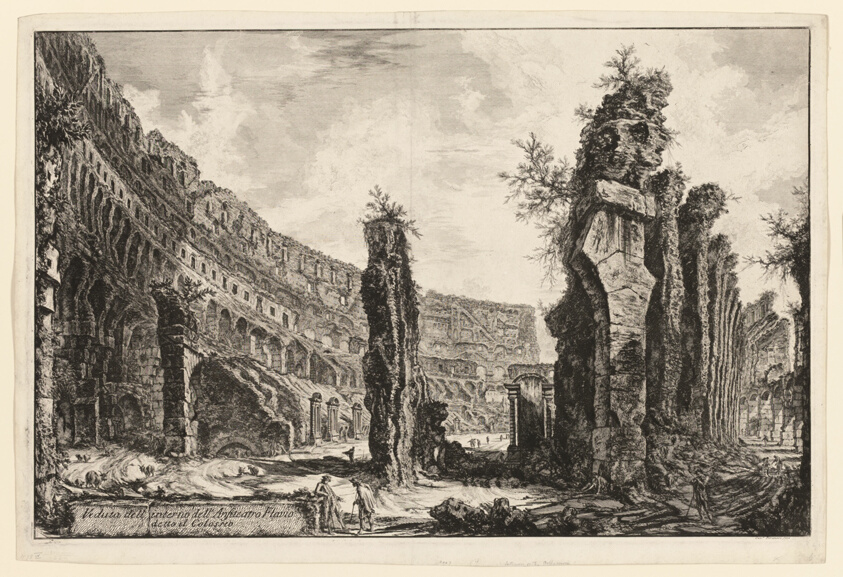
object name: Print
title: Interior view of the Colosseum, from Views of Rome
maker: Giovanni Battista Piranesi (Italian, 1720-1778)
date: 1766, published 1807–35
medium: Etching on heavy ivory laid paper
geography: Italy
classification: etching; print; prints and drawing